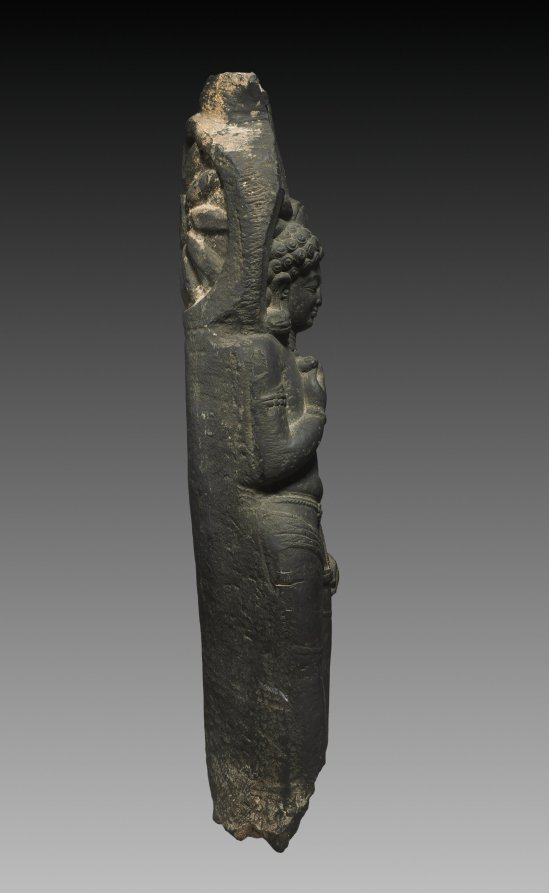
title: Personification of the Discus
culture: Northeastern India, Bihar, Aphsad, early Pala period, 7th Century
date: 670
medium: chlorite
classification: Sculpture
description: Vishnu's main weapon is the discus, or chakra in Sanskrit. Vishnu's chakra is a wheel that is a metaphor for true knowledge, which he uses in mythic battles to slice demons who stand for ignorance and self-centered arrogance. Iconic images of Vishnu show him as four-armed, with a discus in one hand; sometimes the discus is personified. This personification, with the chakra behind his head, has broken away from the main image of Vishnu. Stylistically this sculpture retains memories of the Gupta styles, with the lush ringlets of hair curling from a central part, the relatively simple adornments, and the soft contours of the body. The exaggerated facial expression and figural proportions indicate a transition to a later period.